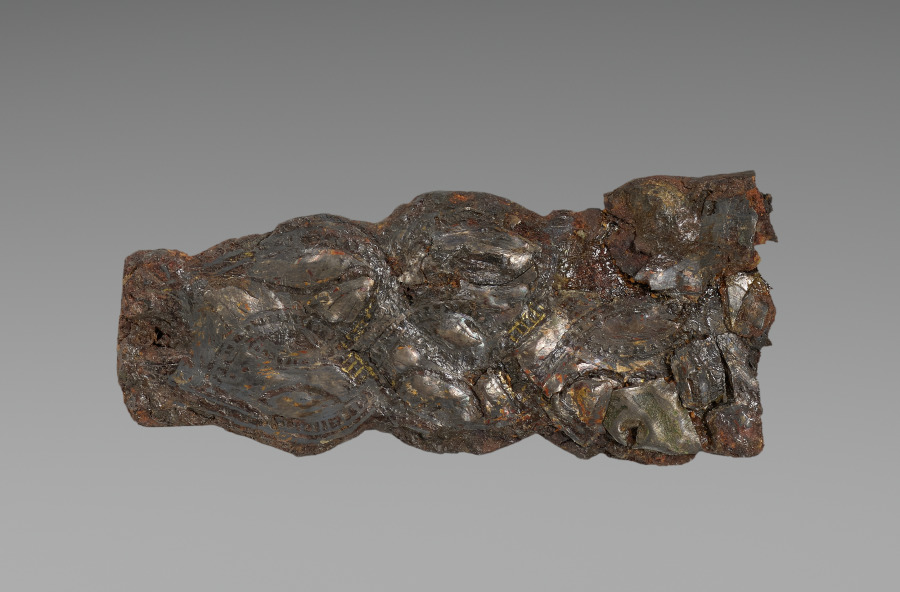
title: Buckle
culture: Merovingian, Burgundian, Migration period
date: 600s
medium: iron with silver overlay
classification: Jewelry